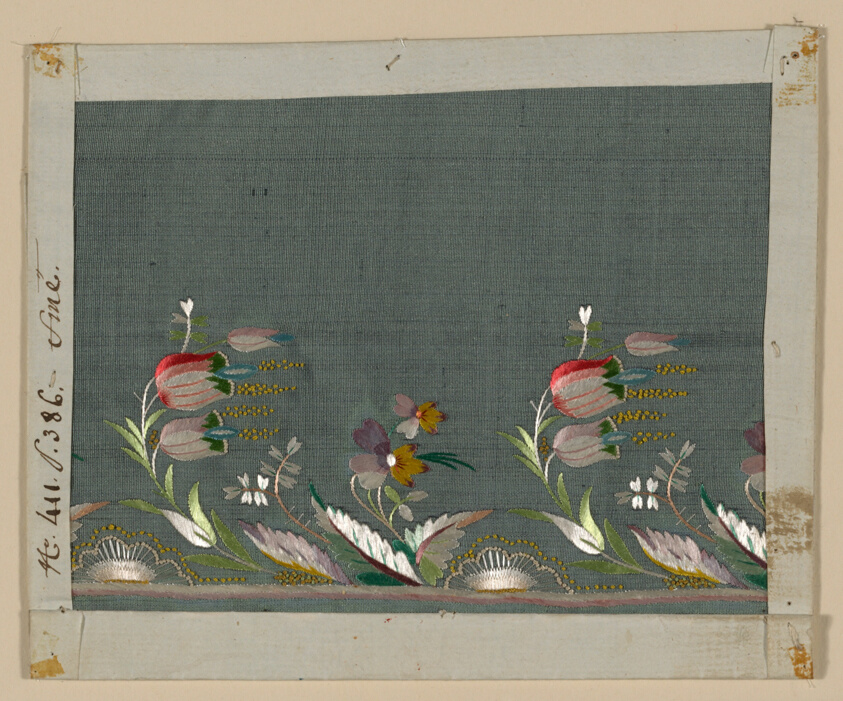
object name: Textile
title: Salesman's Sample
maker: France, possibly Lyon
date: 1780/90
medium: Silk, plain weave; embroidered with silk floss in outline, satin and single satin stitches; French knots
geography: France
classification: textile; costume; needlework (visual works)